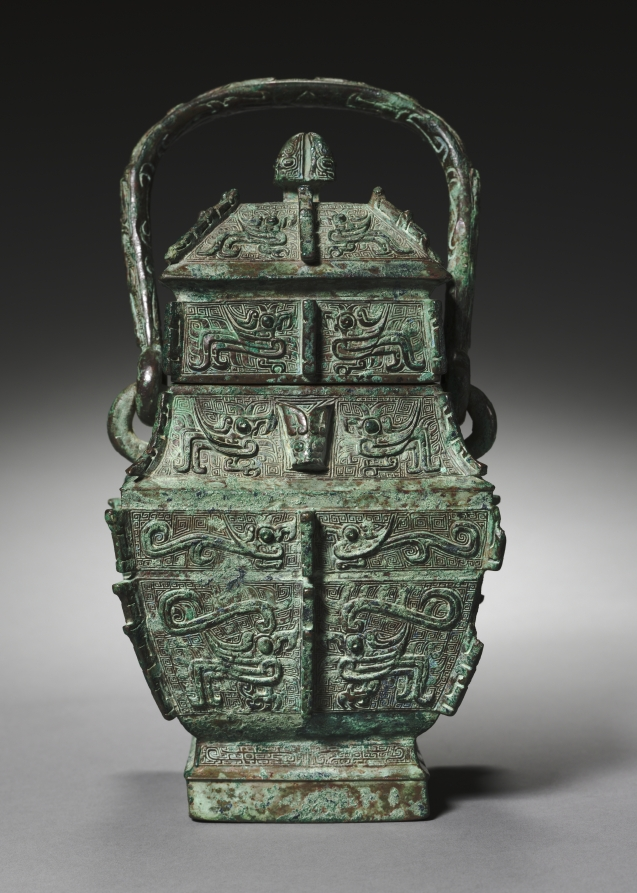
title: Square Wine Container (Fangyou)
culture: China, Henan province, probably Anyang, Shang dynasty (c. 1600–c. 1046 BCE), Anyang phase (c. 1250–1046 BCE)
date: c. 1250–1046 BCE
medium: bronze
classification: Metalwork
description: From the finely proportioned body to the elaborate decoration cast with great precision, this ritual wine vessel displays the artistic refinement and technical virtuosity that marked the full blossoming of late Shang bronze art. The dramatic contrast of the crested birds (kuifeng) against the dense background of spiral patterns (leiwen) gives the vessel a new force, clarity, and intense vitality. The distinctive square body also places it as a rare and important type among the more usual round or ovoid types.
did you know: The bird motif decoration of this bronze is uncommon; more often these bronzes are decorated with a combination of birds and dragons.